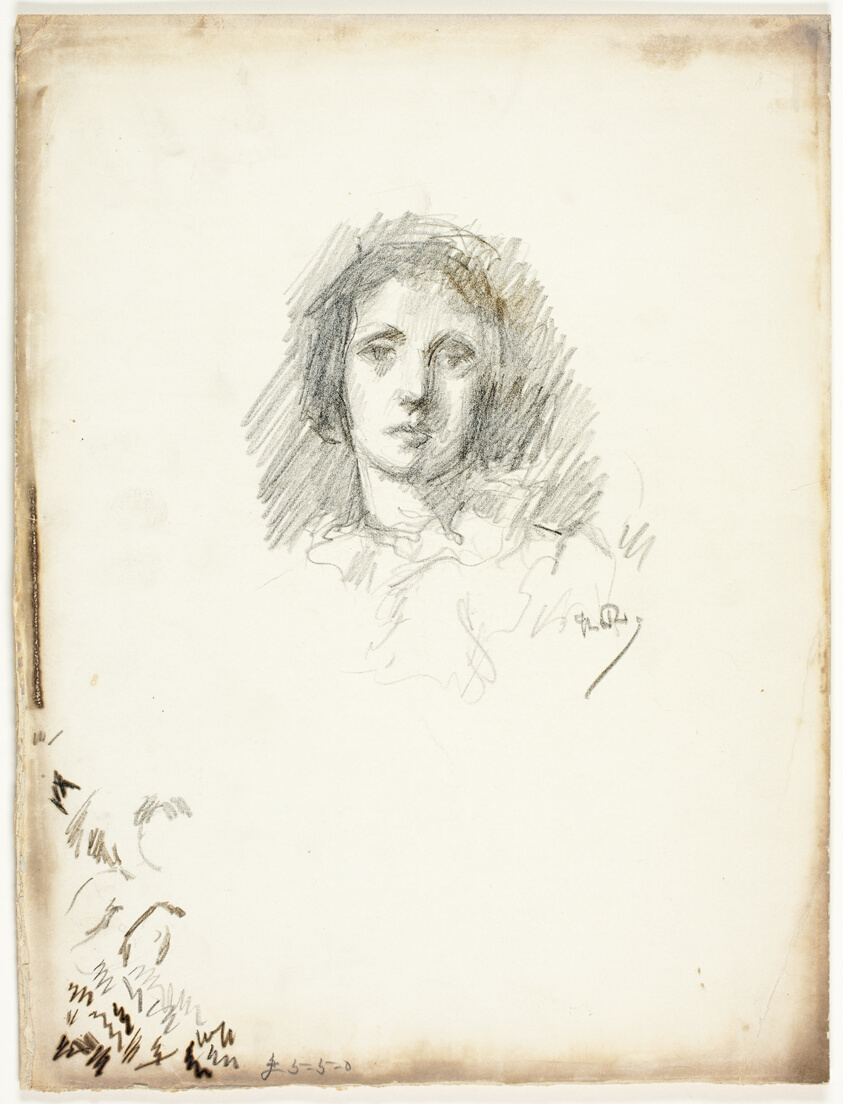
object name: Drawing and Watercolor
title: Portrait Head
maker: Theodore Roussel (French, worked in England, 1847-1926)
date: c. 1894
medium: Lithographic crayon on prepared transfer paper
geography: England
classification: lithograph; prints and drawing; paper